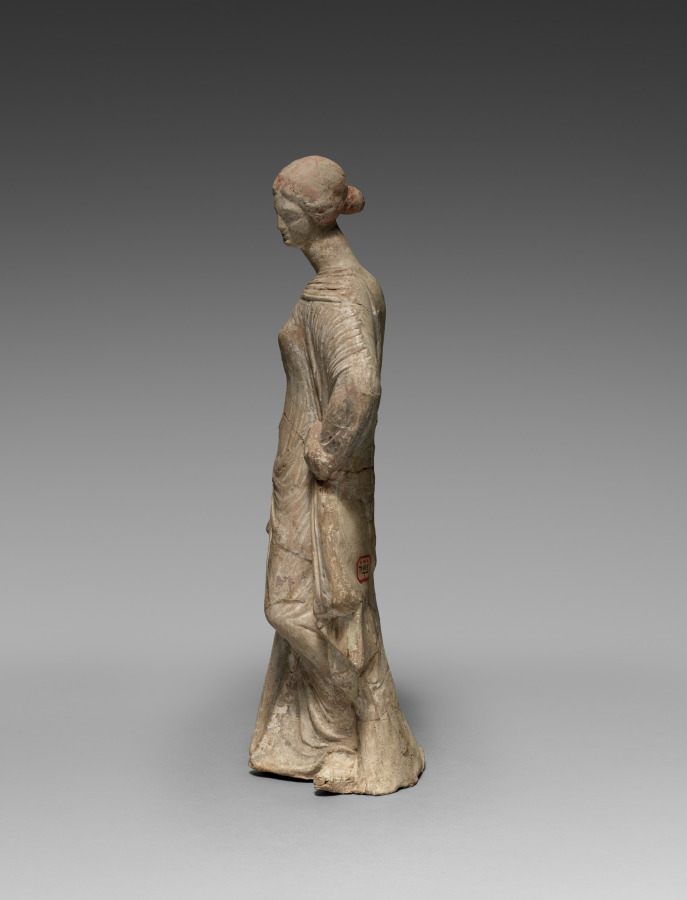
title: Figurine of Standing Woman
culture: Greece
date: 200s BCE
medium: terracotta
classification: Sculpture